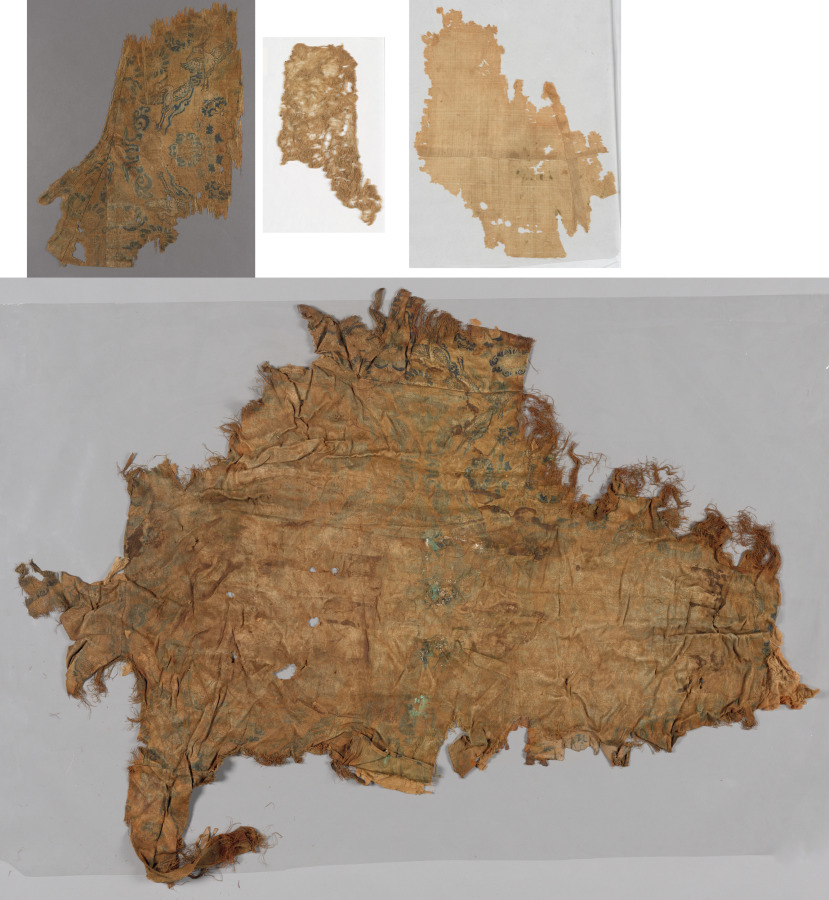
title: Fragments from a Garment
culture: China, Liao dynasty (916-1125)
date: 900s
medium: Silk, weft-faced compound twill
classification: Textile